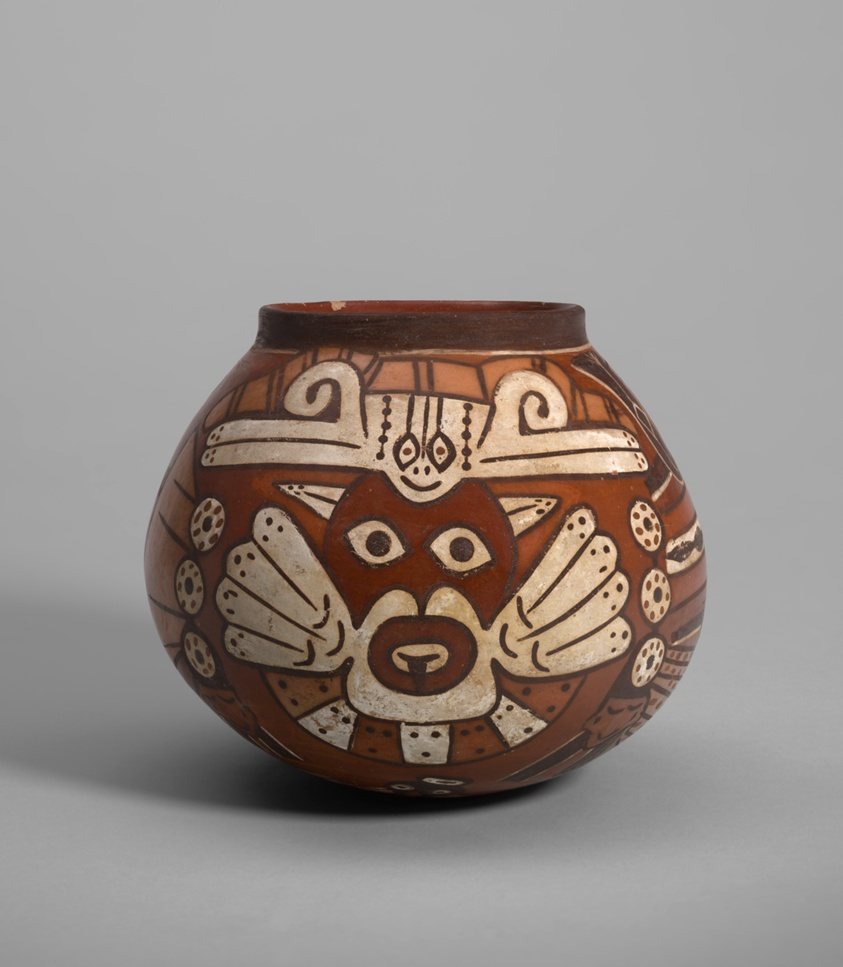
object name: Vessel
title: Vessel Depicting a Costumed Ritual Performer Holding a Staff and a Trophy Head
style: nazca, early intermediate period, Pre-Columbian, americas, Arts of the Americas, andean, andes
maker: Nazca; South coast, Peru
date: 180 BCE–500 CE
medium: Ceramic and pigment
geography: Peruvian South Coast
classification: earthenware; art of the americas; ceramics; vessel